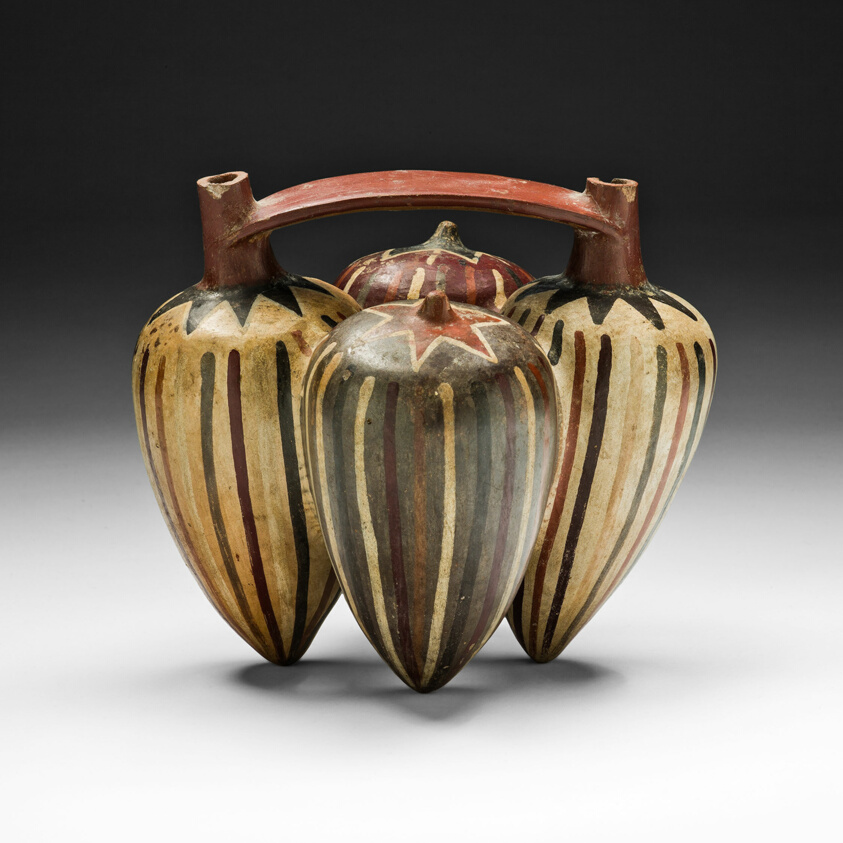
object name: Vessel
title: Vessel in the Form of Pepino Peppers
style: nazca, early intermediate period, Pre-Columbian, americas, andes, Arts of the Americas, andean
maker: Nazca; South coast, Peru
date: 180 BCE–500 CE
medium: Ceramic and pigment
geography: Peru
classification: earthenware; art of the americas; ceramics; vessel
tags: landscapes, agriculture, plant-derived motif